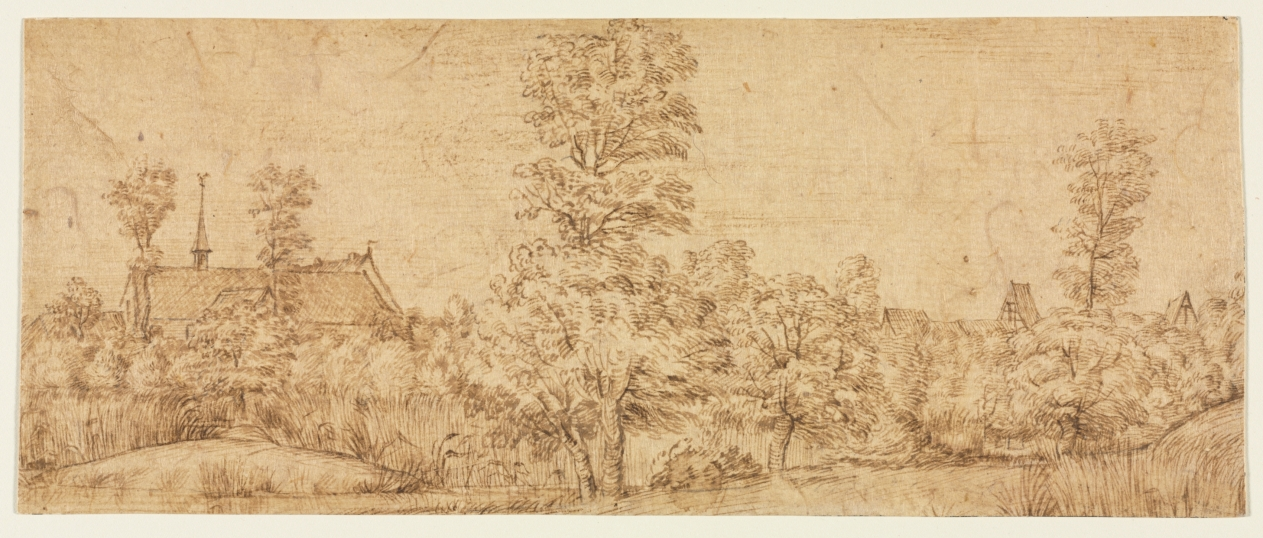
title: Trees before a Village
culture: Netherlands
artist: attributed to Jan Lievens (Dutch, 1607–1674)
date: 1650–75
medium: point of brush and brown ink and brush and brown wash over traces of black chalk; framing lines in brown ink (bottom and right edges)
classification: Drawing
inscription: VERSO OF SECONDARY SUPPORT, lower right, in brown ink: J Livens ; upper left, in graphite: 910 ; center, in graphite: Lucas Van Vden [partially erased] / ? A Van de Velde [partially erased] / [illegible] ; lower left, in graphite: V Uden [crossed out and partially erased] ; lower left, in graphite: Livins 1971; lower right, in graphite: #52 / 1/8" float / 3 [erased] 21